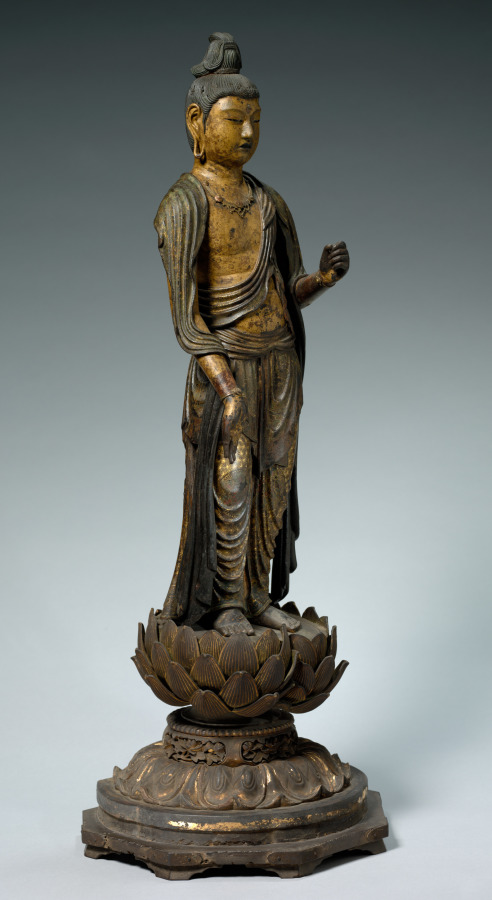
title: Bodhisattva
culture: Japan, Kamakura period (1185–1333)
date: c. 1200–1250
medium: lacquered wood with color, gilt copper, and cut-gold (kirikane)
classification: Sculpture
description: This sculpture represents one of two bodhisattvas who flank the Buddha Amida, the Buddha of Infinite Life and Light. He has one foot in front of the other and his right leg bent at the knee to show that he is in motion; his torso also sways. He accompanies Amida as he descends to collect a dying person who has asked to be born after death into Amida’s Pure Land, a place conducive to progressing along the path to enlightenment.